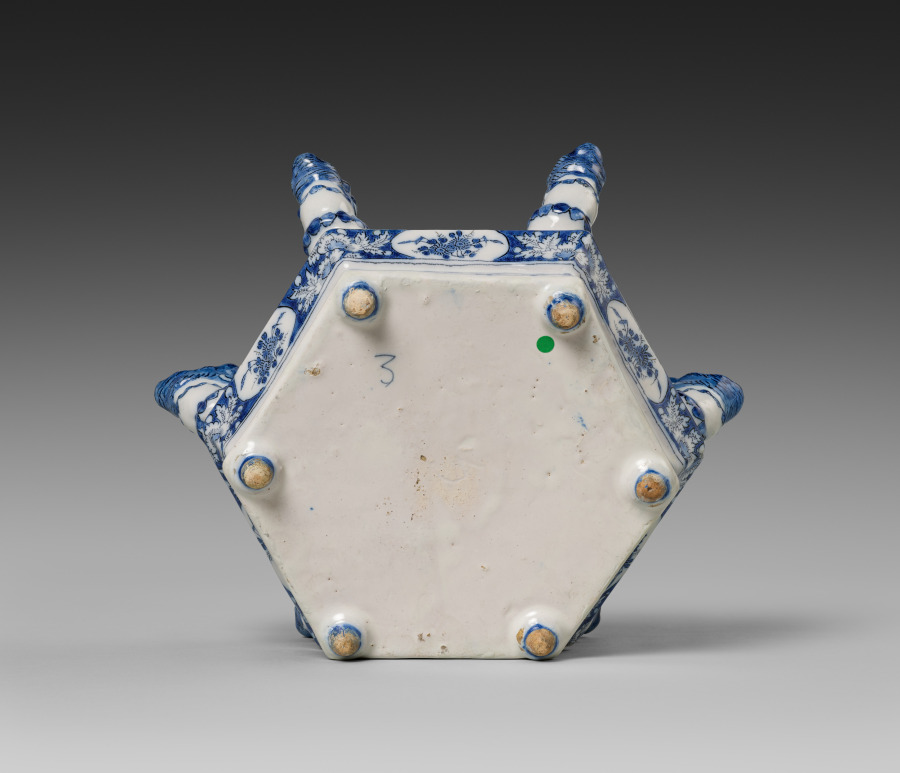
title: First Tier for a Flower Pyramid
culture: Netherlands, Holland, Delft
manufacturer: Adrianus Kocx (Dutch, active 1686–1701)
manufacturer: De Grieksche A (The Greek A) Factory (Netherlands, 1658–1811)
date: c. 1690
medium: Tin-glazed earthenware, painted in blue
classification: Ceramic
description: Allegorical figures representing Faith, Hope, and Love decorate the base of this pyramid, on which rest six tiers with spouts where flowers can be placed. Flower pyramids are among the most complex and luxurious types of ceramics produced in Delft in the late 1600s. This example was made in the Greek A Factory, owned by Adrianus Kocx. During his tenure, the factory became the most prestigious of Delft potteries and received commissions from Queen Mary II, who ruled over England, Scotland, and Ireland together with her husband, William III. She contributed to the international spread of the fashion for Delft ceramics.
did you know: The iconic blue-and-white ceramics from Delft originated as an attempt to copy Chinese porcelain.